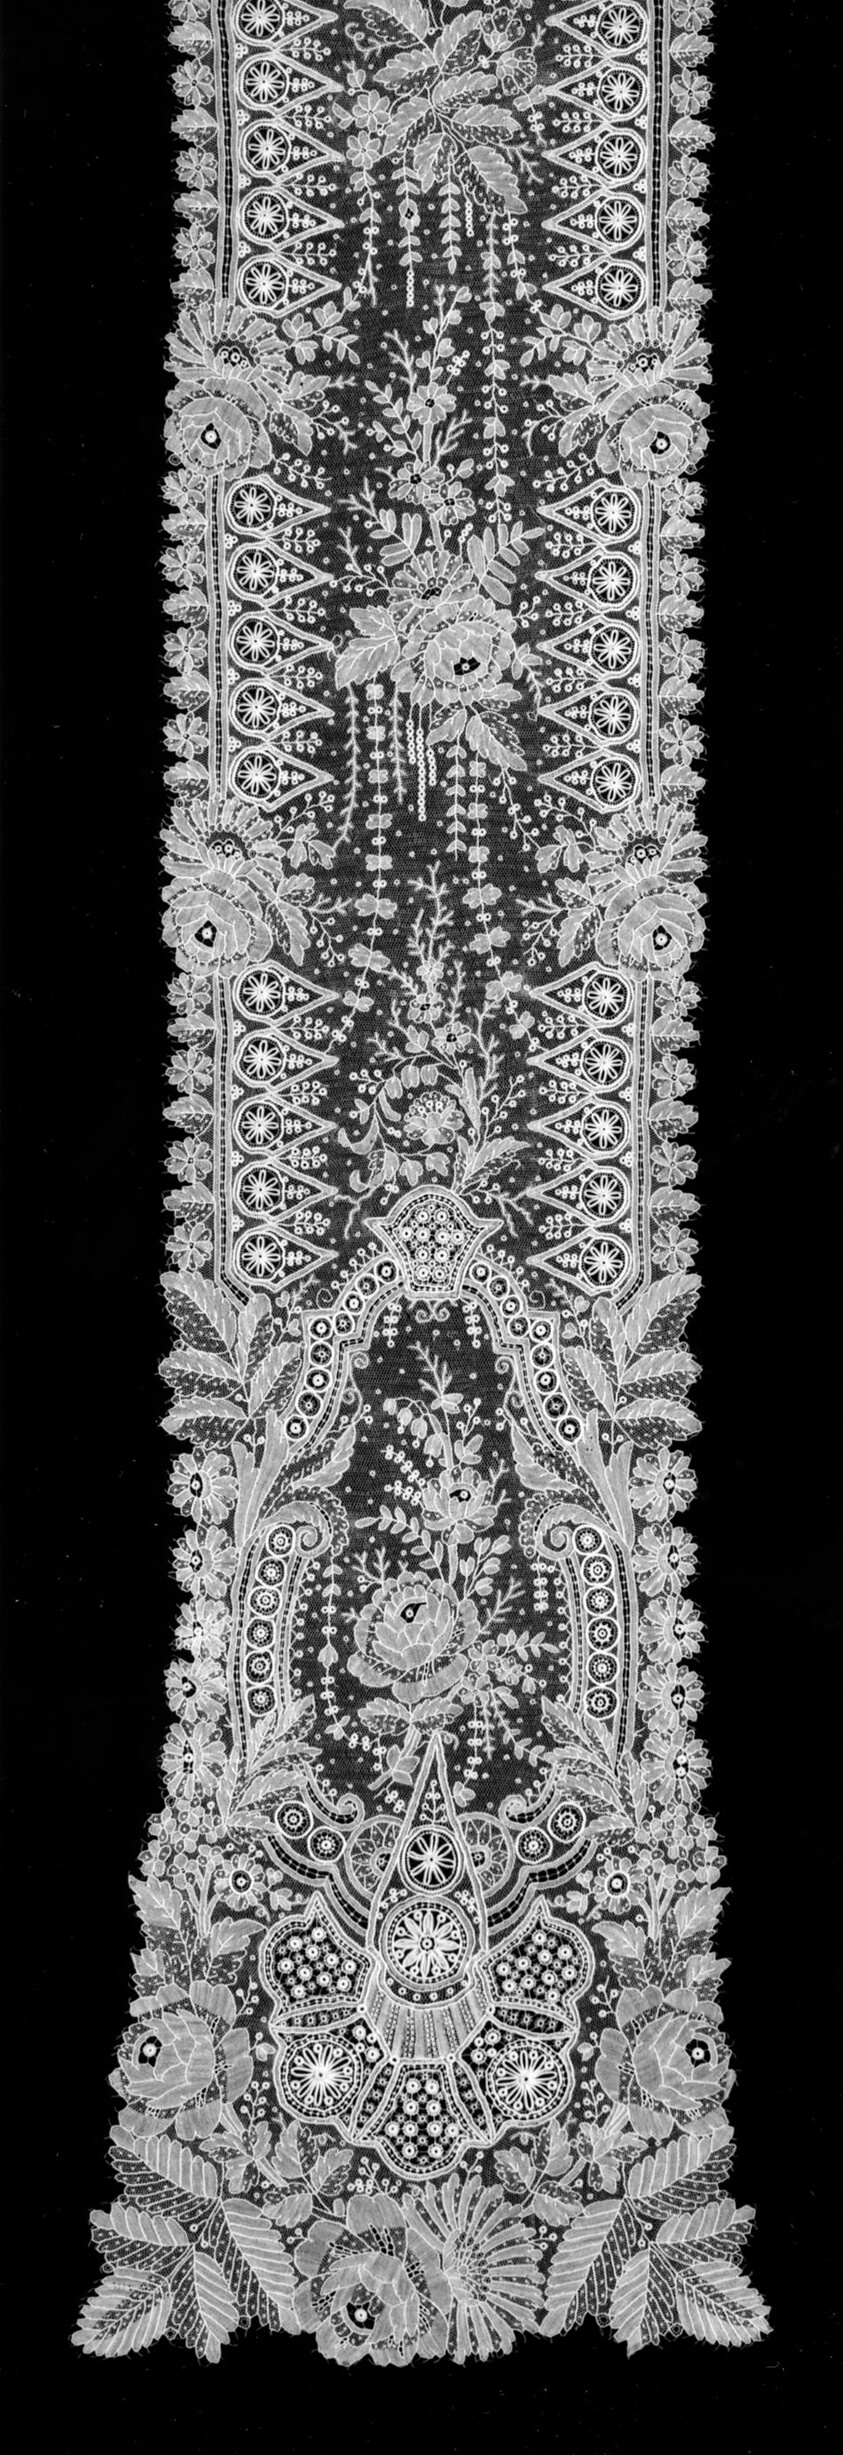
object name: Costume and Accessories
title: Scarf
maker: Belgium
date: 1870/90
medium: Cotton, needle lace of a type known as "Point de Gaze"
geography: Belgium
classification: textile; lace - needle; costume